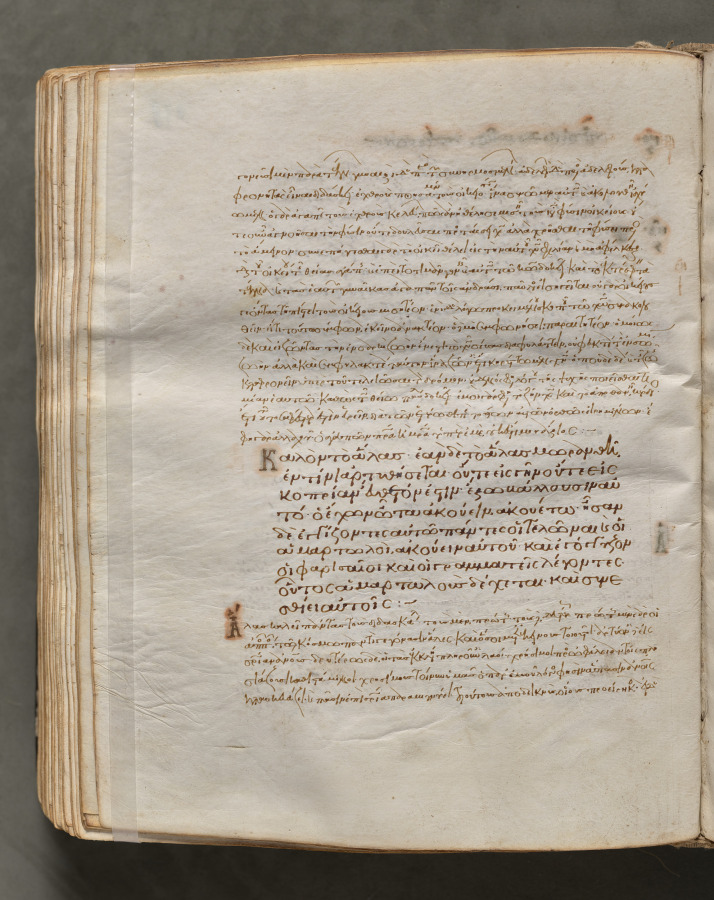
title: Text, folio 279 (verso), from a Gospel Book with Commentaries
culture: Byzantium, Constantinople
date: c. 1000–1100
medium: ink, tempera, and gold on vellum; leather binding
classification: Bound Volume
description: Each of the four gospels in this book opens on a page with brilliantly illuminated borders depicting the author of the text as well as birds—principally peacocks, symbols of the immortality of the soul—and fountains, representing the fountain of life and the salvation of the soul. This volume consists of 428 leaves with texts in Greek. Its level of sophistication suggests that it was probably written and decorated in a monastery in Constantinople.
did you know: Gospel books were carried in procession through Byzantine churches.